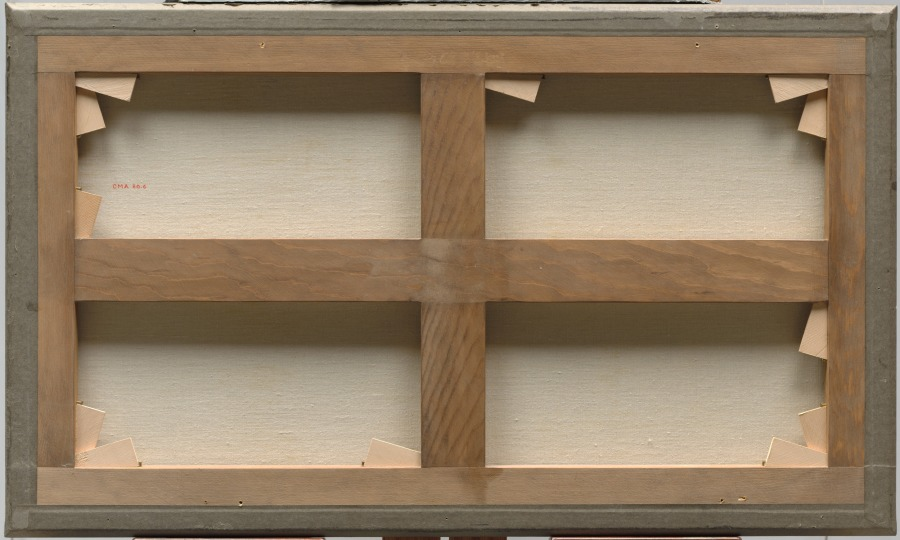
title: Still Life with Sweets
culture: Spain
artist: Juan van der Hamen y Léon (Spanish, 1596–1631)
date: 1622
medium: oil on canvas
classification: Painting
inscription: Signed lower left: "Ju Vander Hamen/ de Leon fa[t], 1622"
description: Placed on a simple stone ledge, this bold arrangement includes a wooden box, a dark glass bottle, some walnuts, an elaborate Venetian glass, and several sweets called turrones. These delicacies are a mixture of pine nuts, honey, almonds, and hazelnuts. The picture may not represent an actual meal or snack. Rather, the artist played with contrasts and harmonies of shapes, textures, and colors. During his short career van der Hamen, whose father was from the Netherlands, worked at the Spanish royal court and created biblical pictures, history paintings, allegories, and landscapes. He is best known for his portraits and still lifes.